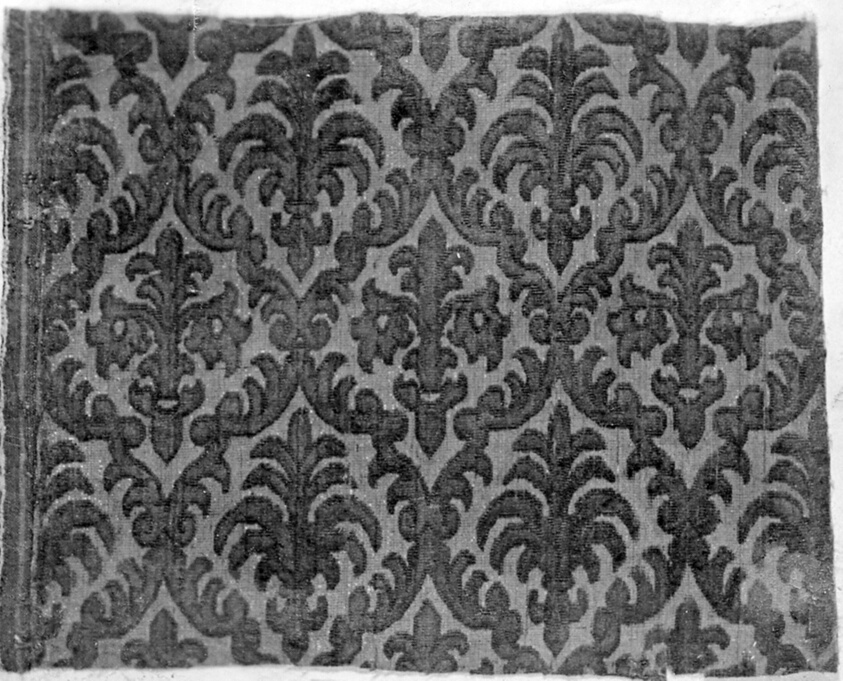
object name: Textile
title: Fragment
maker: Italy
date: 1600/50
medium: Silk and gilt-metal strip, plain weave with supplementary facing wefts and pile warps forming cut and uncut voided velvet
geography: Italy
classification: textile; weaving - velvet; weaving